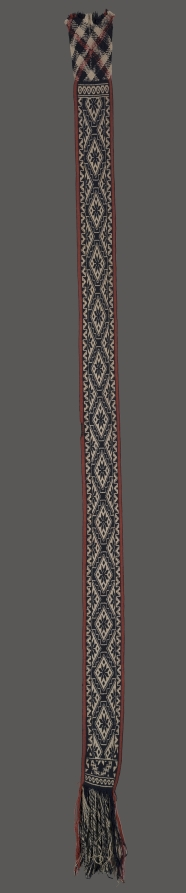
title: Girdle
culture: Mexico, Huichol, 20th century (?)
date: c 1900s ?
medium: double cloth: wool?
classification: Garment